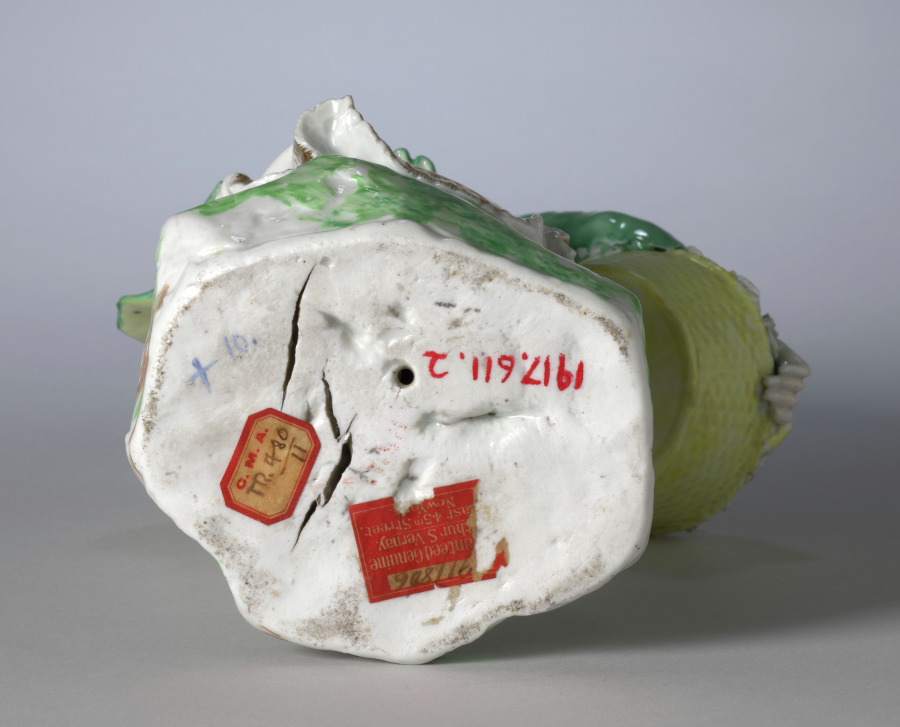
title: Figure of Spring from the Four Seasons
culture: England, Bristol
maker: Bristol Porcelain Factory (British, 1770–81)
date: c. 1775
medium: hard-paste porcelain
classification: Ceramic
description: The modern notion of childhood as a time of innocence and simplicity emerged during the second half of the eighteenth century. This understanding of adolescence led to numerous depictions of children as personifications of the four seasons. Here spring is portrayed as a young girl adorning her hair with flowers. The flowers filling her basket and growing in the grass around her signal spring’s arrival.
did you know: Allegorical figures most often decorated a table during the dessert course, providing amusing subjects for conversation.